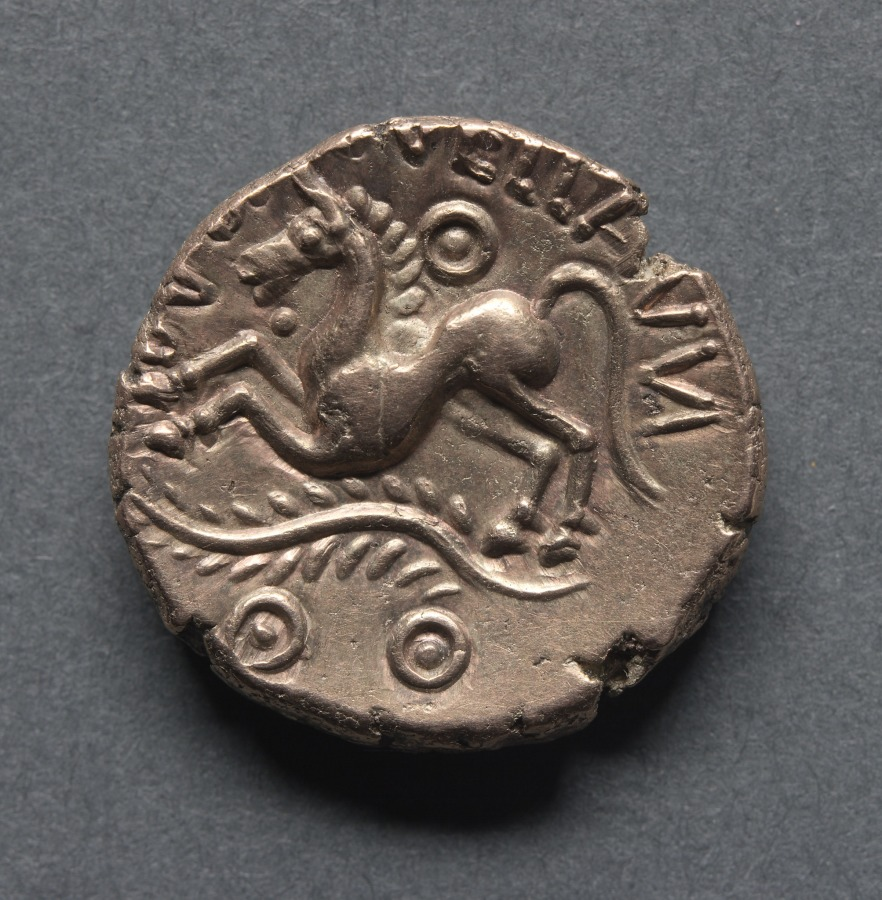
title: Dubnovellaunos Stater: Wreath and Crescents (obverse); Horse with Branch (reverse)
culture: England, Trinovantes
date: 20 BCE–10 CE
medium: gold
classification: Coins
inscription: [DVBNO]VELLAVN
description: Dubnovellaunus was the king of the area around Kent. He was a warlike ruler and at various times possessed territory on both sides of the Thames. He may have succeeded Addedomaros by conquest and ruled over the Trinovantes. He undoubtedly suffered defeat at the hands of Cunobeline of the Catuvellauni and was forced back to Kent. He was one of the British chieftains mentioned with Tincommius on the monument to Augustus at Ancyra in Galatia.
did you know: Dubnovellaunus, an early king of ancient Britain, is known from the discovery of coins that bear his name.